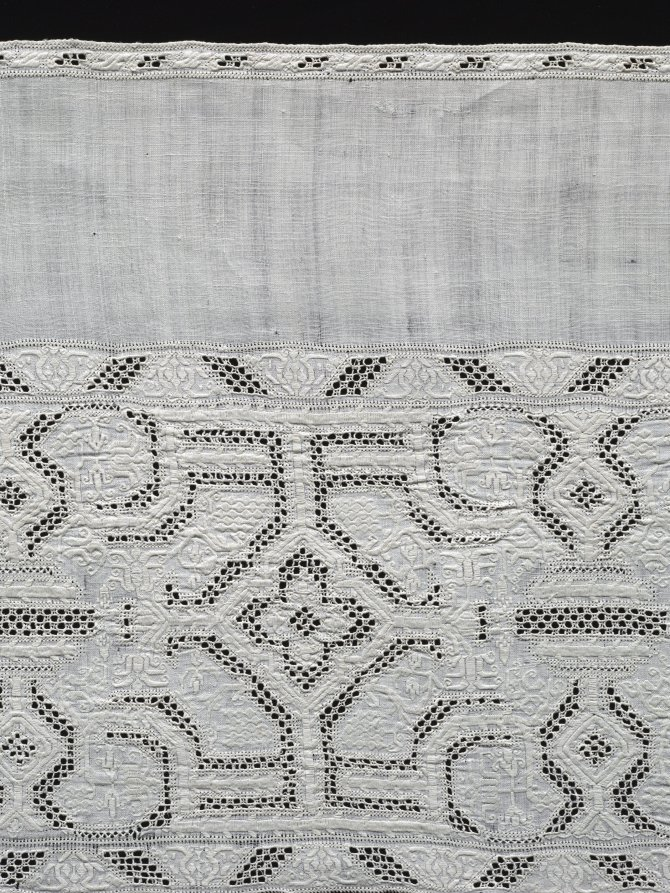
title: Lace Panel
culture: Italy, Padua and Venice, 16th century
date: 1560–99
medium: Linen: needle lace (cutwork) and bobbin lace edging and embroidery (satin stitch [Punto Reale])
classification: Lace